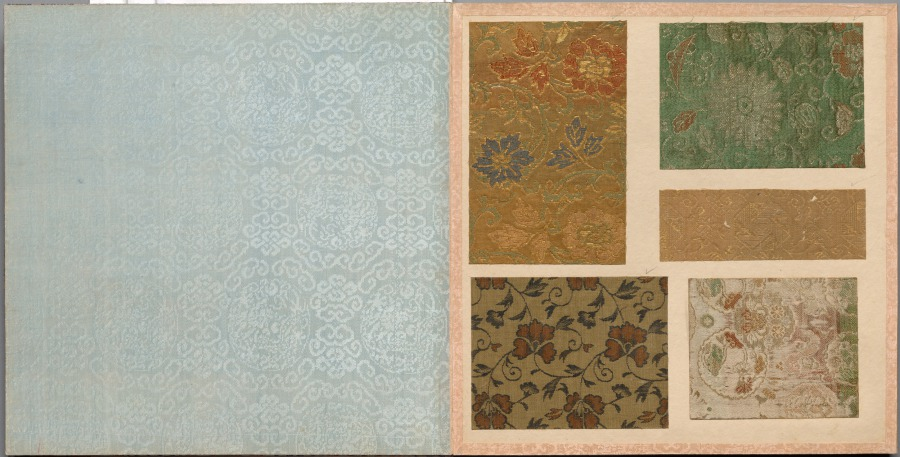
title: Album of Textile Samples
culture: Japan and China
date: 1700s–1800s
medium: silk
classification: Textile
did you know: This album has 26 pages containing 128 mounted Chinese or Japanese textile samples.